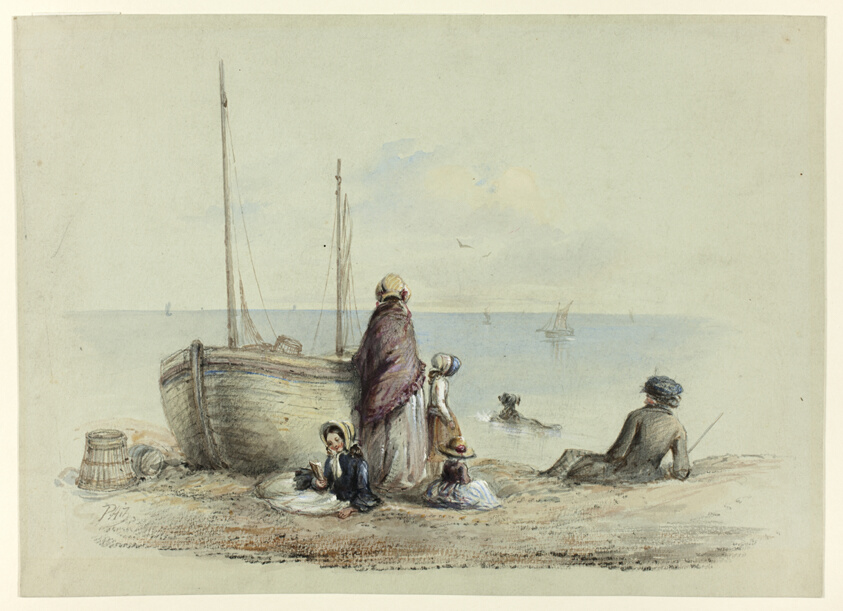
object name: Drawing and Watercolor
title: Family on a Beach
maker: Hablot Knight Browne (English, 1815-1882)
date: c. 1850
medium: Watercolor, with black crayon, heightened with white gouache, on grayish-green wove paper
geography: England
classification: watercolor; drawings (visual works); prints and drawing